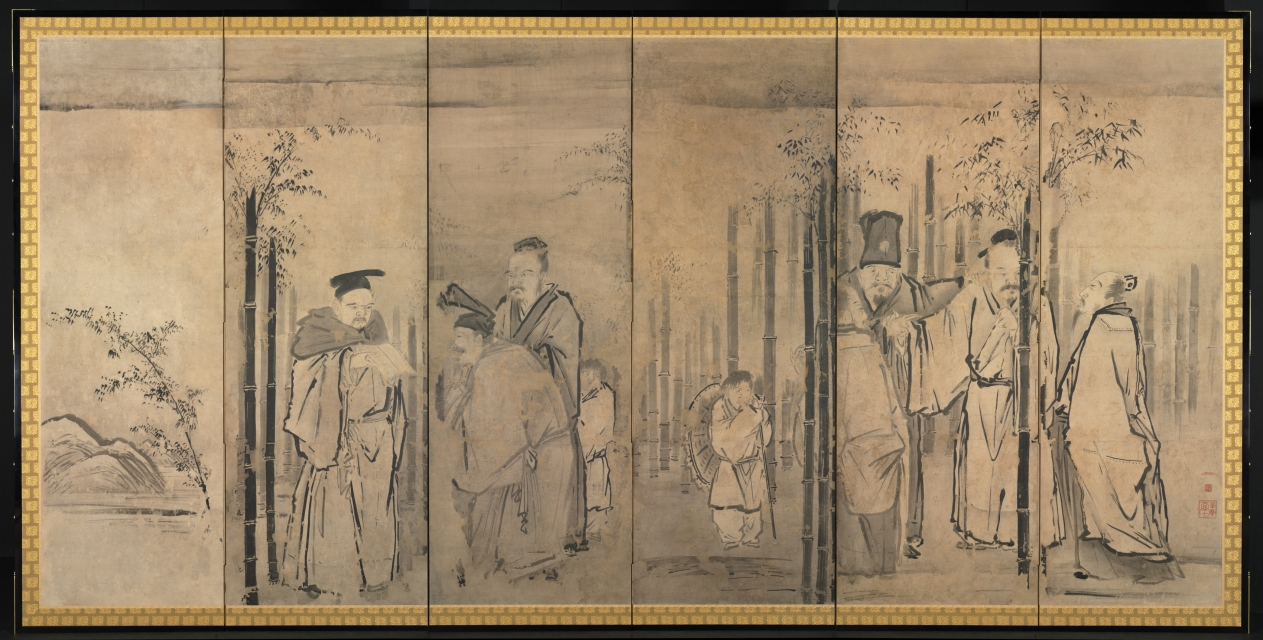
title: Seven Sages of the Bamboo Grove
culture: Japan, Edo period (1615–1868)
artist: Kano Tan’yū (Japanese, 1602–1674)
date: 1600s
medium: pair of six-fold screens; ink on paper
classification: Painting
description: The Kano school was a group of professional artists patronized by the shogun from the late Muromachi period to the Edo period. The group adopted themes of reclusiveness to convey the importance of loyalty to the shogunate. A leader of the Edo Kano school, Kano Tanyu paired Seven Sages of the Bamboo Grove and Four Elders of Mt. Shang to reference a painting of the same theme attributed to Kano Motonobu. Seven Sages of the Bamboo Grove refers to the elites who escaped the social chaos of China’s Wei-Jin period (AD 200s–400s); they fled to a secluded bamboo grove where they could express themselves freely, enjoying pure conversation, music, and wine. The other screen, Four Elders of Mt. Shang, depicts the scholars who left the turbulence of the late Qin dynasty to pursue their scholarly interests in seclusion on Mt. Shang in Shanxi province.